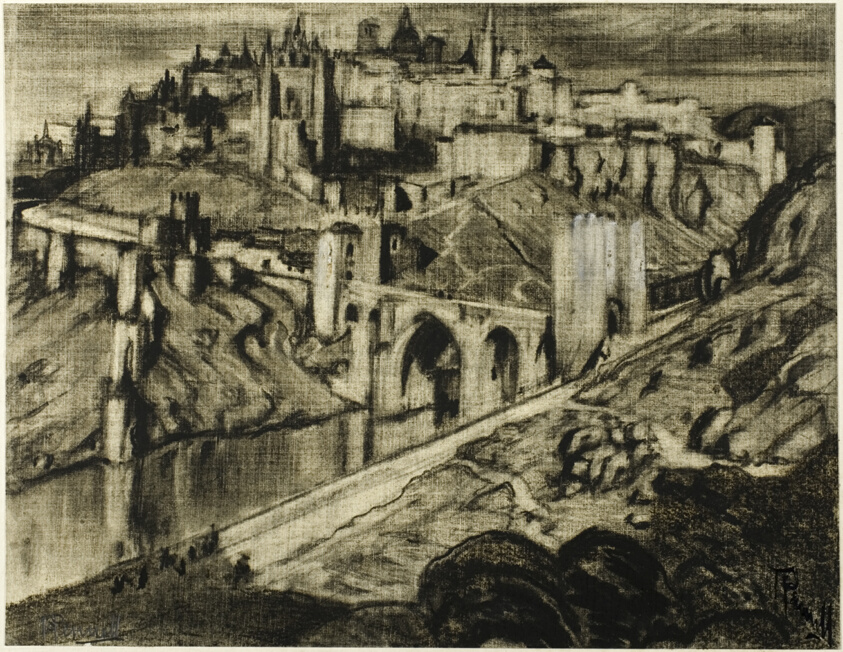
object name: Drawing and Watercolor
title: The Towering City, Toledo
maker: Joseph Pennell (American, 1857-1926)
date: c. 1903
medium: Oiled charcoal, with stumping and erasing, heightened with touches of white chalk, on cream wove paper, perimeter mounted on off-white wood pulp laminate board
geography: United States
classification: charcoal; drawings (visual works); prints and drawing